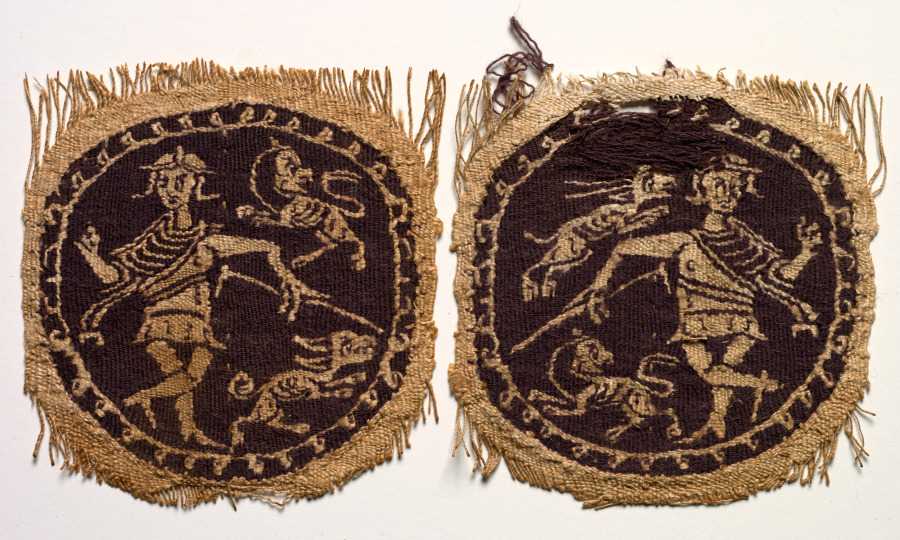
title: Segmentum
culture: Egypt, Umayyad period (661–750) or Abbasid period (750–1258)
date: 700s - 900s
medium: tapestry weave; wool and linen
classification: Textile